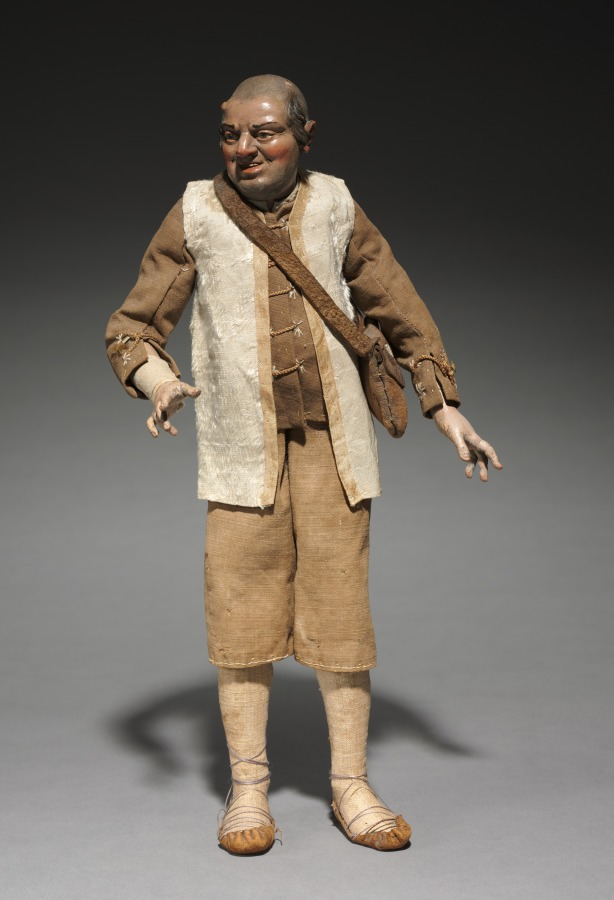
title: Figure from a Crèche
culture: Italy, Naples, late 18th-early 19th century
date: 1780–1830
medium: painted wood and terracotta with various textiles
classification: Sculpture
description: The practice of creating scenes of the Nativity for the home dates from the early 1700s in Italy, where people began to set up doll-like figures of about a foot or less in height. The custom was particularly popular in Naples around 1800, where crèche scenes (crèche means cradle, or crib) included many figures, whose heads and hands of painted terracotta, stuffed cloth bodies, and clothing adapted from contemporary local costumes gave them an amazingly realistic character. Representations of the birth of Jesus can be traced to the first few centuries of Christianity. Both living creatures and sculptural depictions of them were used from early times. By the late middle ages it was customary to create life-size figures of wood or stone, naturalistically painted, to represent the characters who participated in the events of Jesus's early life. These sculptures were then arranged in scenes illustrating one or both of the most important of these events, the Adoration of the Shepherds and the Adoration of the Magi-the three kings from the East who came to pay homage to the Christ child. Used in churches, these large figures were especially popular in Italy, Central Europe, Spain, and Portugal.